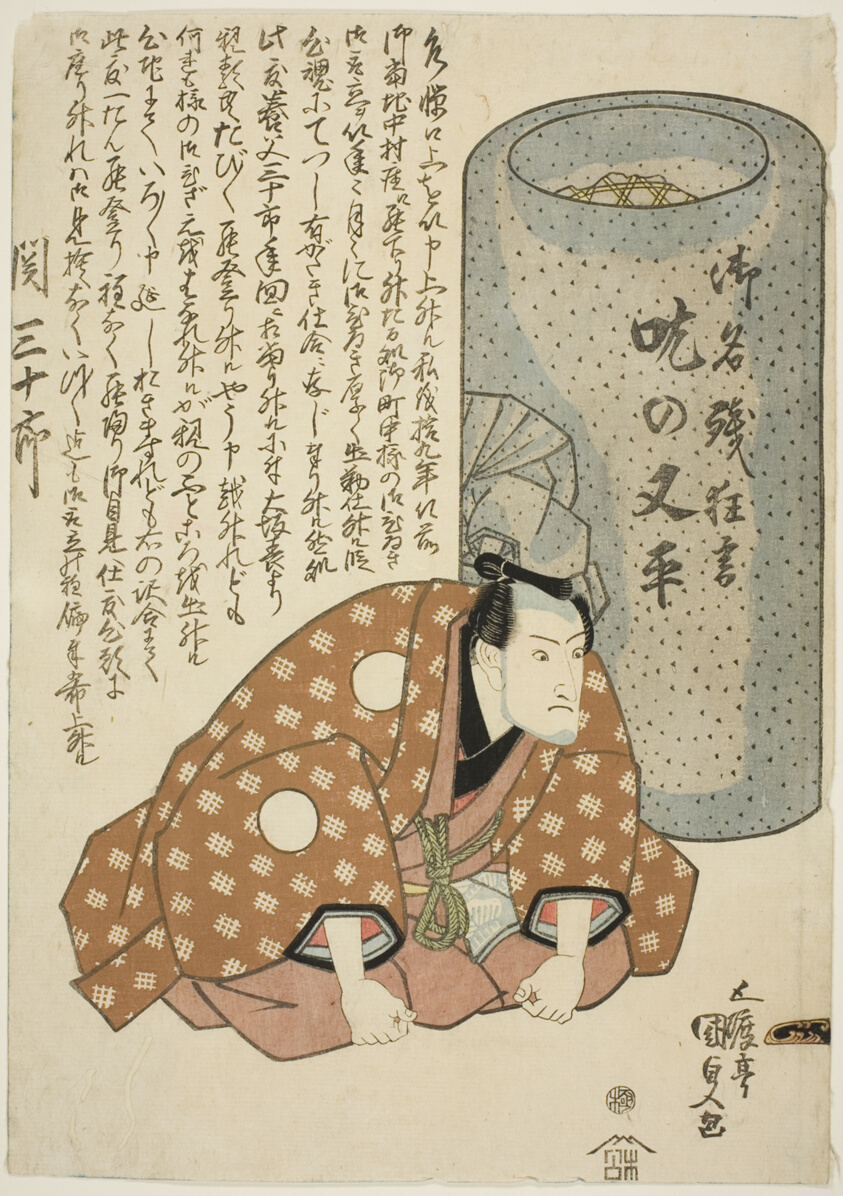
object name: Print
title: The actor Seki Sanjuro II as Stuttering Matahei (Domo no Matahei)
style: Japanese (culture or style)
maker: Utagawa Kunisada I (Toyokuni III) (Japanese, 1786-1864)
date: 1826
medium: Color woodblock print; left sheet of oban diptych (right: 1937.270)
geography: Japan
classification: print; asian art